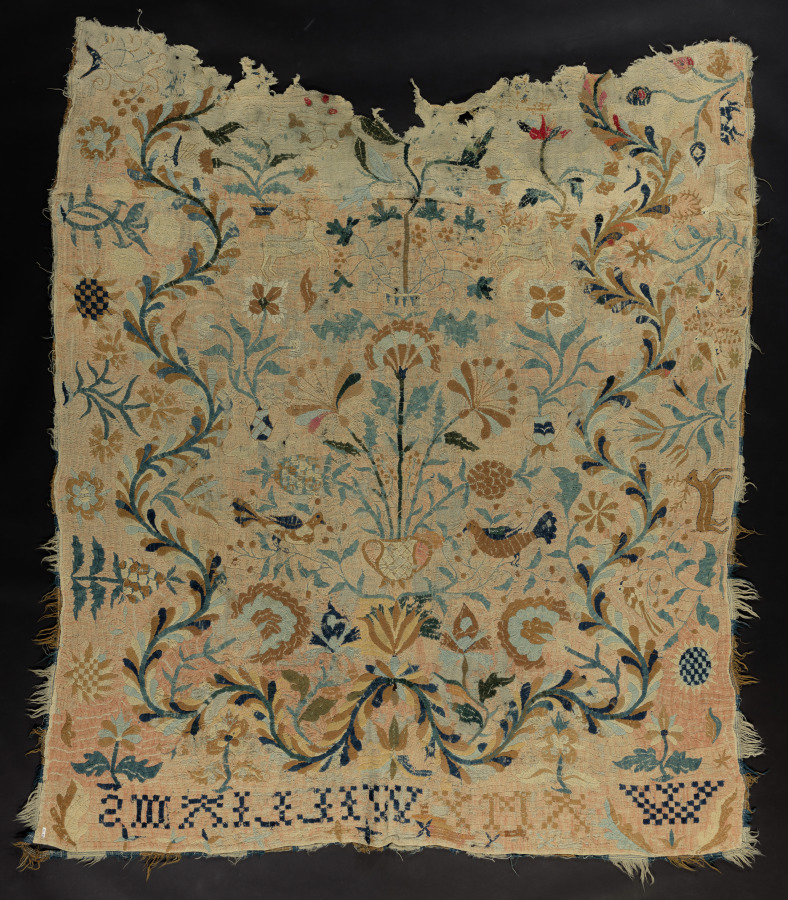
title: Bed Rug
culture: America, late 18th Century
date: c. 1799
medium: Plain weave wool, wool embroidery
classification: Embroidery